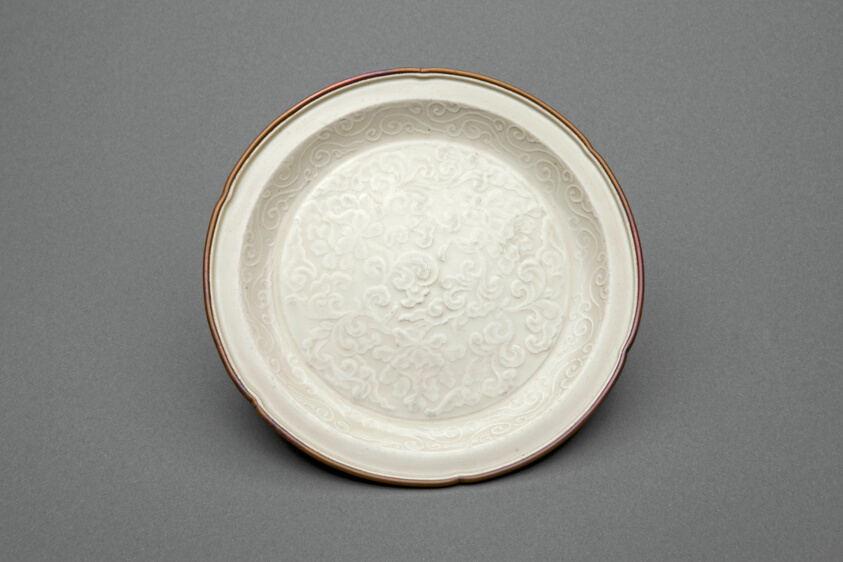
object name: Vessel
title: Lobed Dish with Sylized Peony Scrolls and Key-Fret Border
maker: China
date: Jin dynasty (1115–1234)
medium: Ding ware; porcelain with underglaze molded decoration and copper rim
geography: China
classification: decorative arts